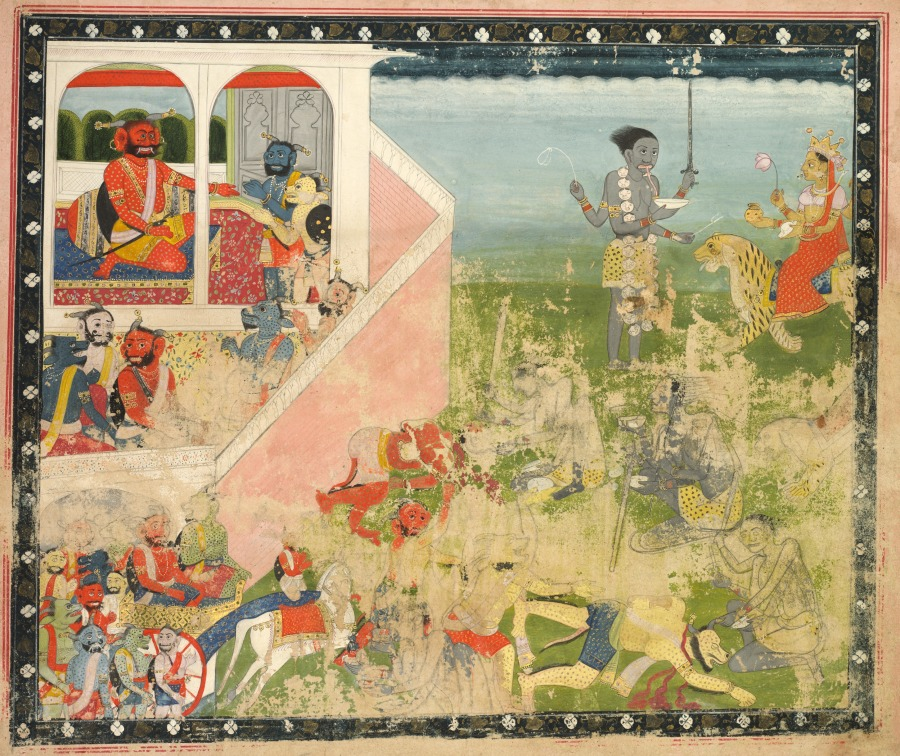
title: Kali and Devi attack, from a Devi Mahatmya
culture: Northern India, Pahari kingdoms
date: c. 1840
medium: Gum tempera, ink, and gold on paper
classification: Painting